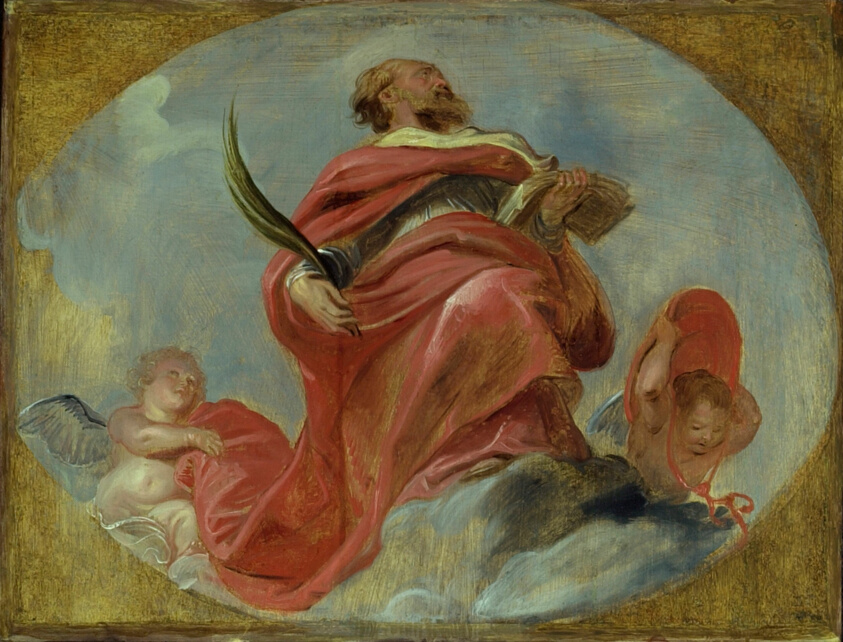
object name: Painting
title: St. Albert of Louvain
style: 17th Century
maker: Peter Paul Rubens (Flemish, 1577-1640)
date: 1620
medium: Oil on panel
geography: Flanders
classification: painting; paint; oil on panel; european painting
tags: saints, cherubs, clouds, man, men, putti, sketch, study